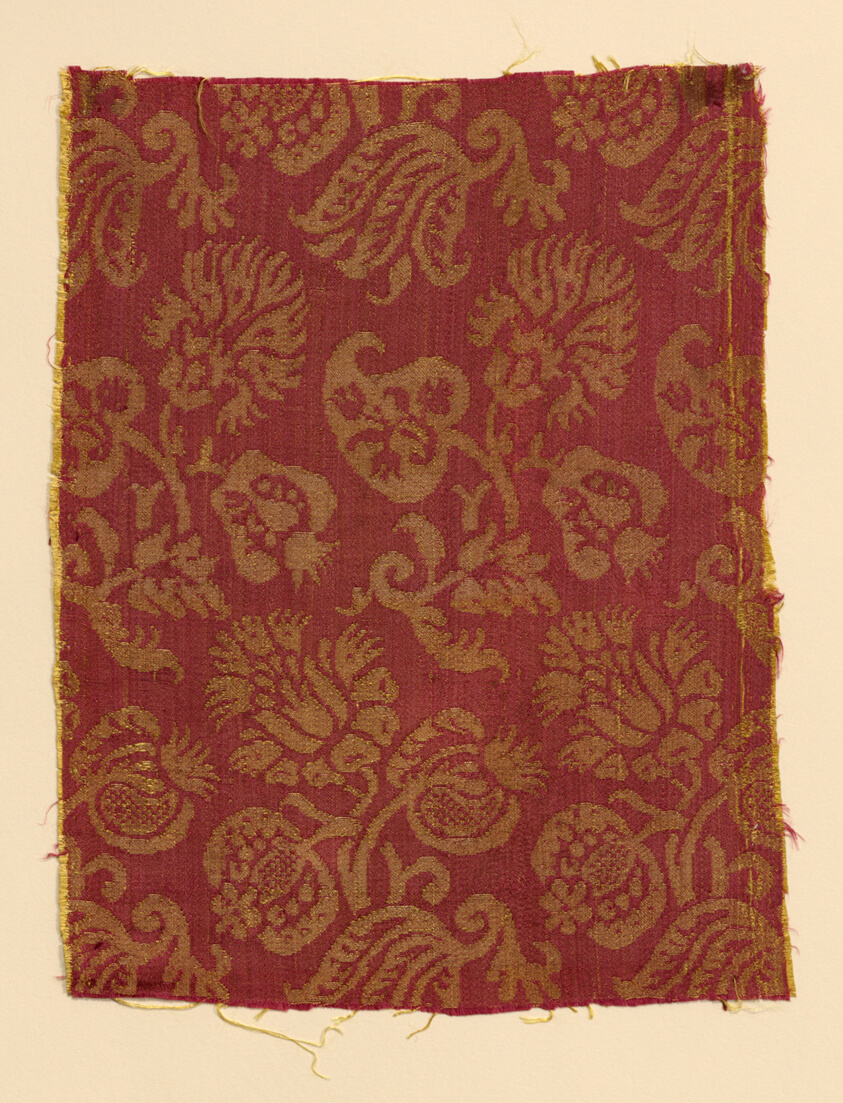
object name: Textile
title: Fragment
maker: Italy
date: 1601/50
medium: Silk, satin damask weave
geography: Italy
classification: textile; weaving